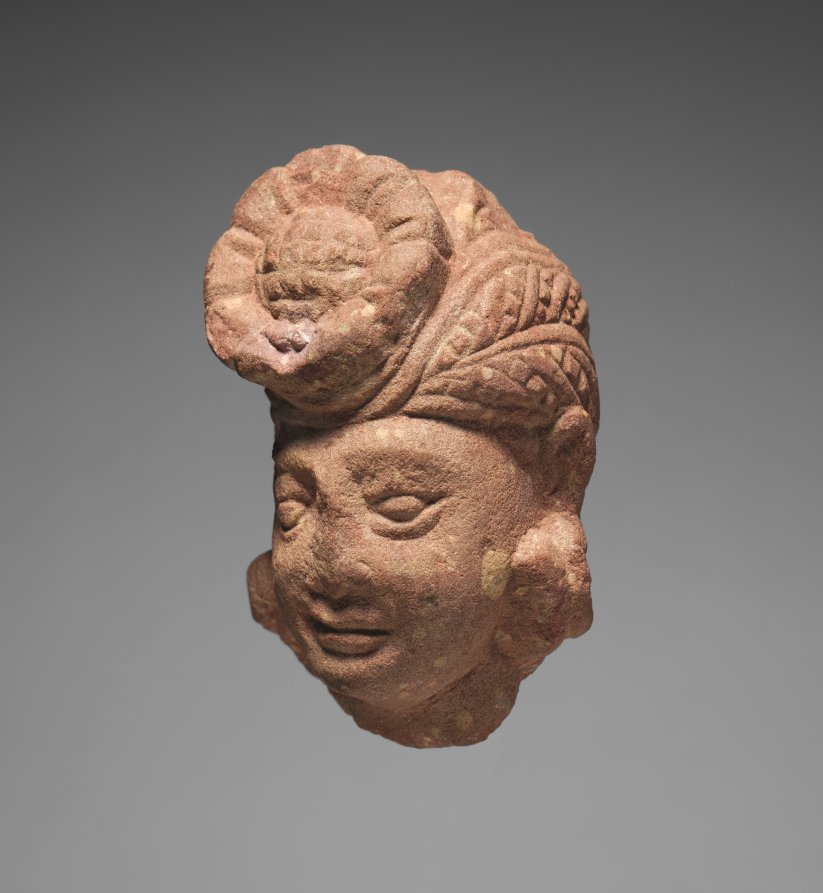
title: Miniature Head of a Bodhisattva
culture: India, Mathura, Kushan period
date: 1–100 CE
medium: red Sikri sandstone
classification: Sculpture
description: Against the backdrop of the large-scale monumental sculpture for which the Mathura school is noted, this miniature head may appear insignificant. However, it exemplifies on a much reduced scale the qualities of style and execution that parallels developments on monumental sculpture. It also reflects a certain freedom of treatment of facial details that clearly denotes that while the artist worked in a minor key, the creation was neither inconsequential nor a sequacious rendering of the major sculptural trends of large-scale sculptures from Mathura. Although this head is small, a sense of volume and mass is conveyed by the bulky earrings, the protruding flowerlike cockade of the turban, and the reduction of linear detail in defining these ornaments and the facial areas. The unridged brows, the generous curves of the jawline and neck, and the soft modulations of the chin and cheeks belie the diminutiveness of the whole. At the same time, the large almond-shaped eyes and the compressed angularity of the upper lip individualize this pensive Bodhisattva head. The modeling and the turban type with the oversized cockade suggest it dates from the pre-Kaniska phase of the first-century sculptures from Mathura.